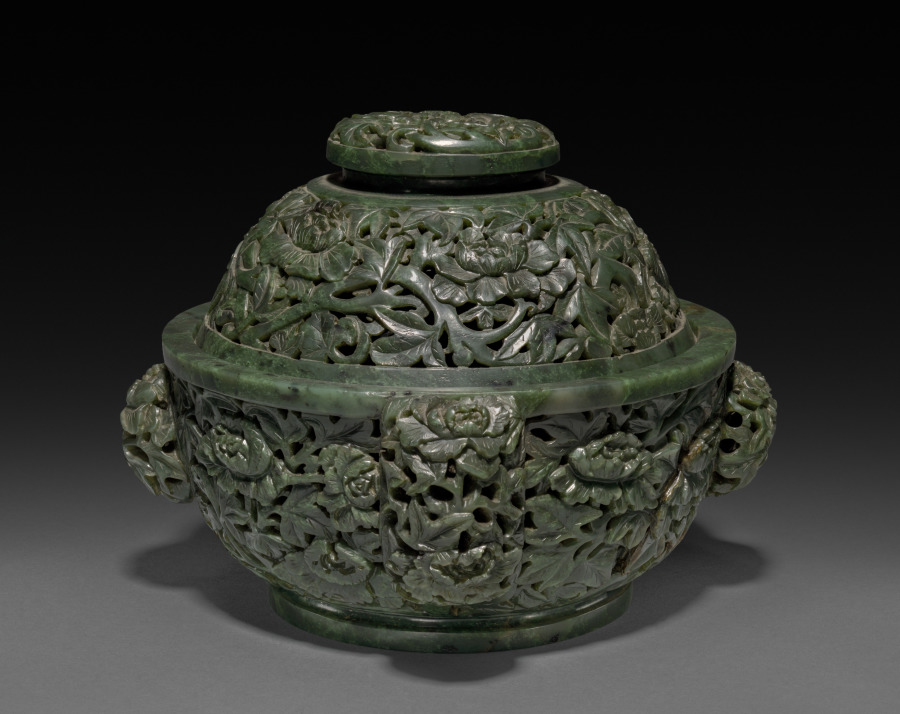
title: Fragrance Container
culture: China, Qing dynasty (1644–1911), Qianlong reign (1736–95)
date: 1736–95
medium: jade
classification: Jade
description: In the Qing (1644–1911) dynasty, luxury items became more affordable to larger parts of the society, including women, merchants, and literati in non-official positions. Imperial patronage and a growing urban population encouraged consumption of luxury goods and local craftmanship. This spinach-green jade incense burner has pierced floral designs and four pierced floral handles. It illustrates the superb carving skills and the creative mind of its accomplished creator, who sought clients on a competitive market